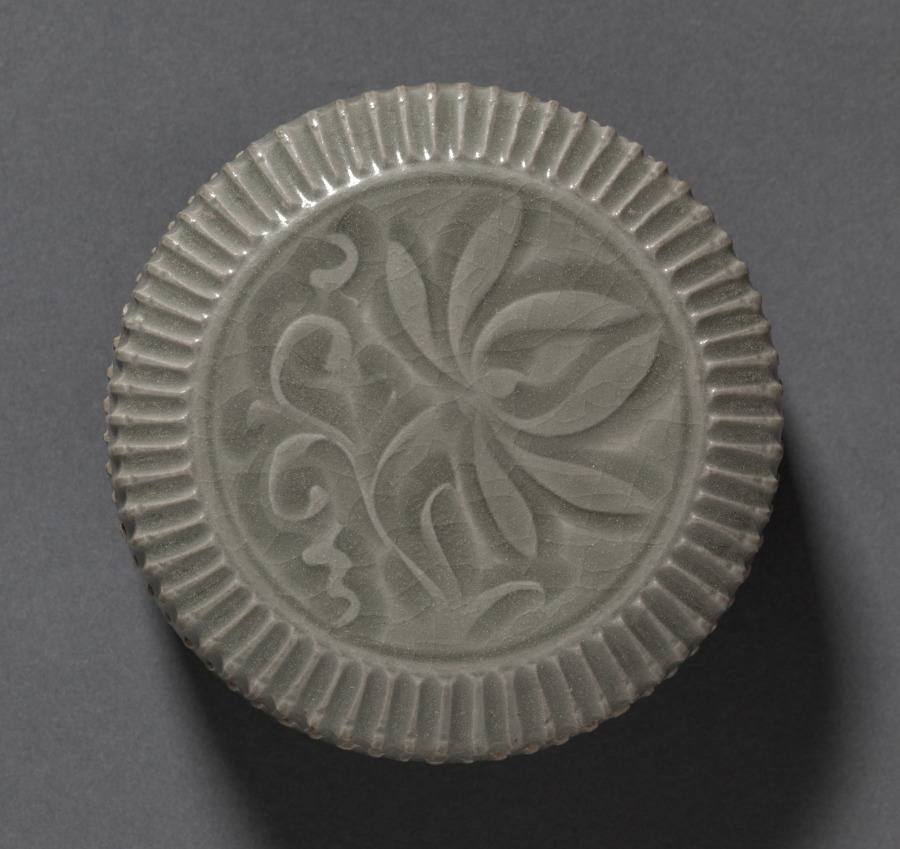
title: Covered Box with Carved Floral Design: Yaozhou Ware (lid)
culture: China, Shanxi province, Northern Song dynasty (960-1127)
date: 1100s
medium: glazed stoneware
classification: Ceramic